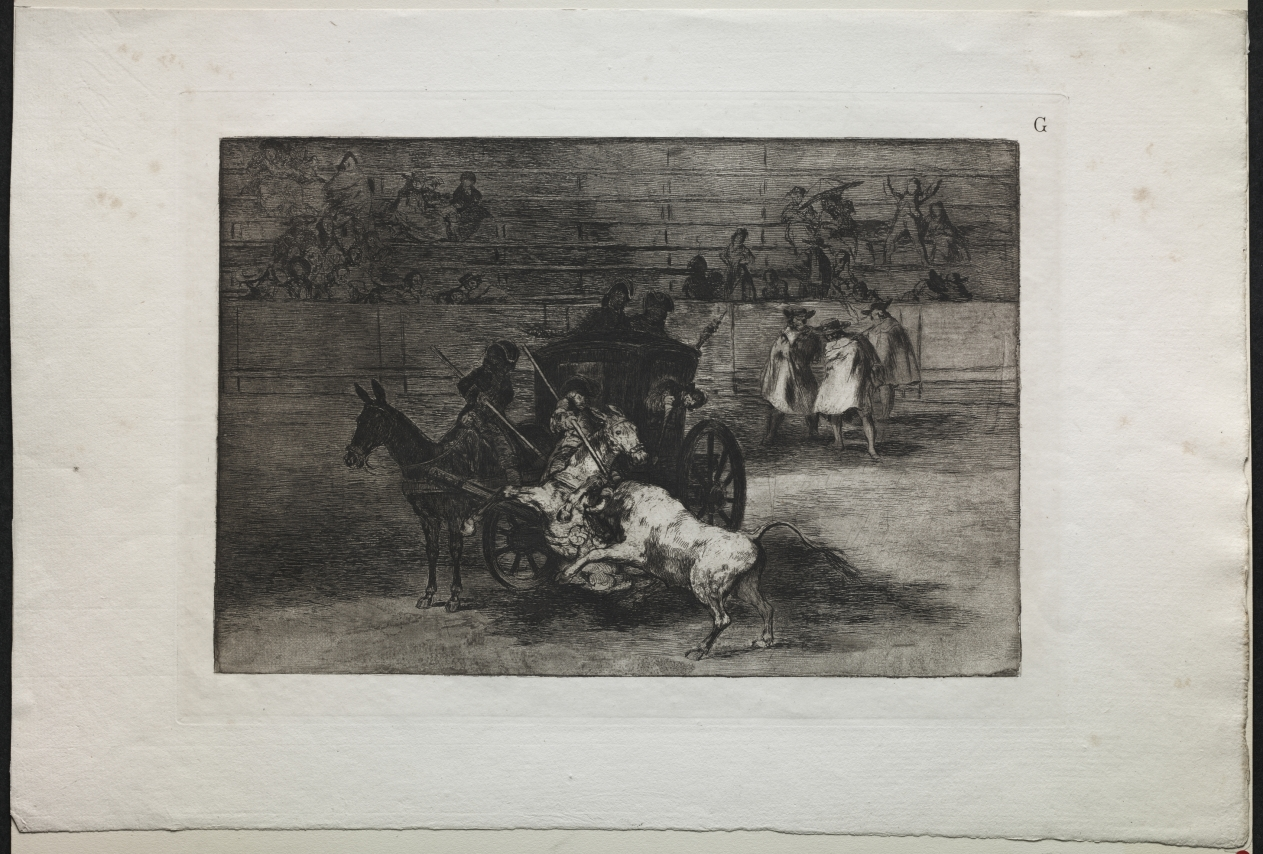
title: Bullfights: Fight in a Carriage Harnessed to Two Mules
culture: Spain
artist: Francisco de Goya (Spanish, 1746–1828)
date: 1816, printed 1876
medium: engraving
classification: Print